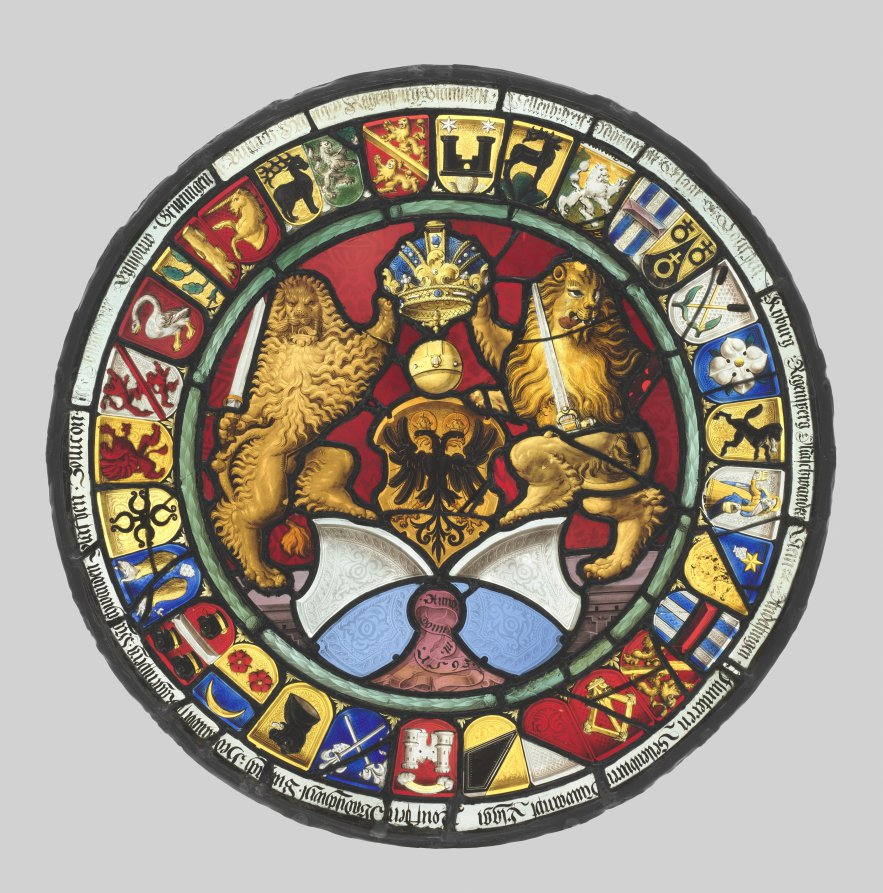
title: Heraldic Roundel with Arms of the Canton of Zürich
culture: Switzerland, Zurich, late 16th Century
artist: workshop of Hans Rütter (Swiss, 1550–1610)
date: 1593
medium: white glass with silver stain and pot metal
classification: Glass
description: The large shield at center incorporating the double eagle (insignia of the Holy Roman Empire) is surrounded by thirty small shields-those of the wards of the city of Zurich. In the late 1400s, it was customary for neighboring Swiss towns and cantons to exchange panels of stained glass to promote closer political relationships.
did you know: The coats-of-arms of 31 different Swiss towns and provinces are shown in the outer ring of this stained glass roundel. If you look closely, you can see flowers, lions, and a unicorn. What symbols would you choose for your own coat-of-arms?